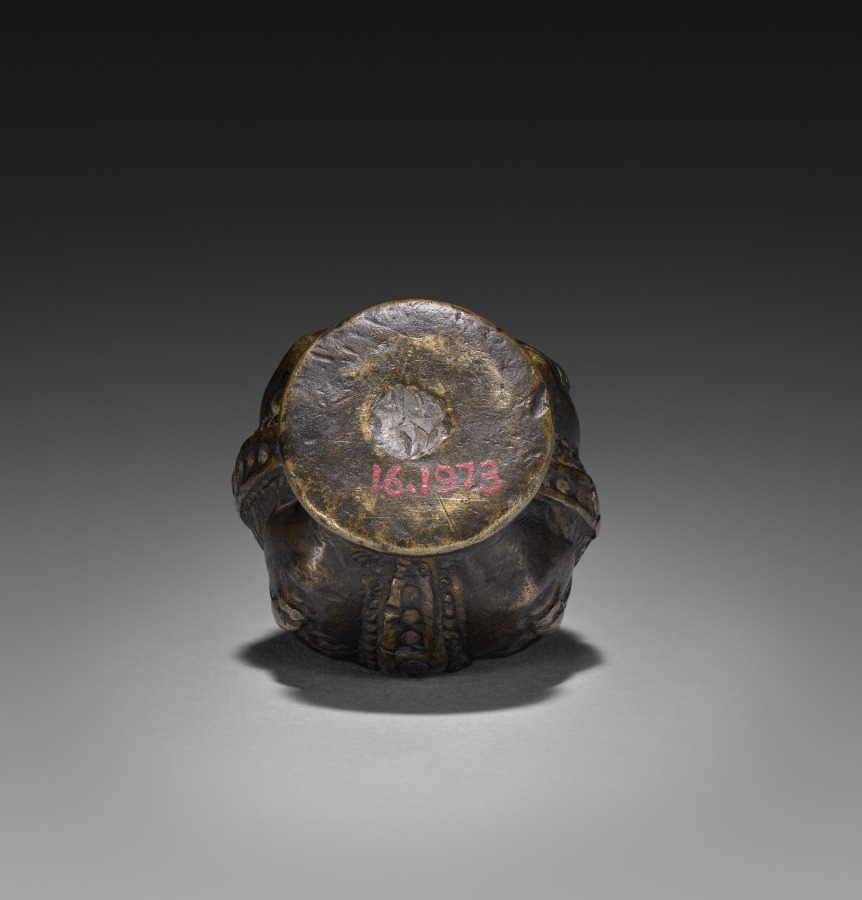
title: Decorative Finial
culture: Italian or French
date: 1800s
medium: brass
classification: Arms and Armor